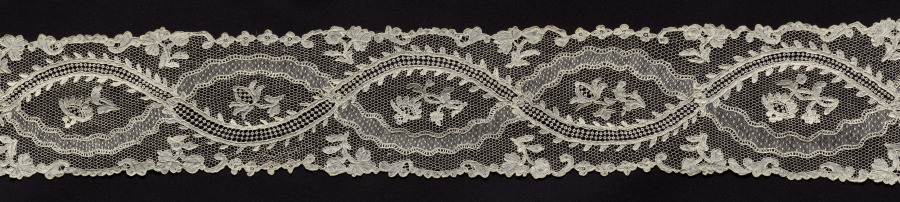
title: Lace Lappet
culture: France, Argentan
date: 1715–74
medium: Linen: needle lace (Point de Argentan)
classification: Lace